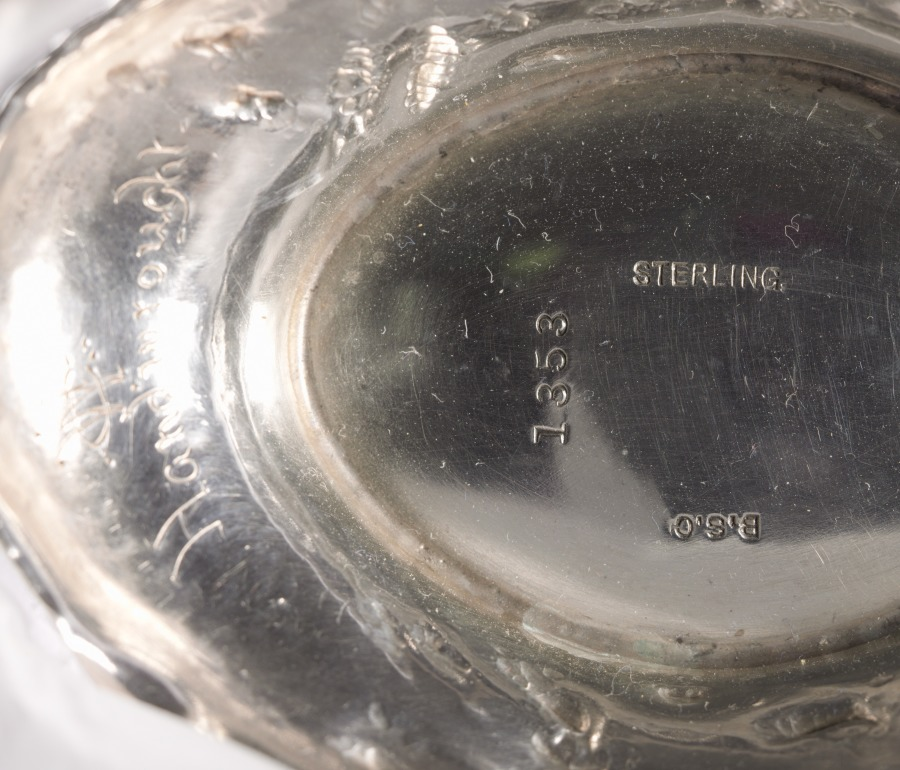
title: Sauce Boats and Trays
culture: America, Rhode Island, 19th century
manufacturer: Barbour Silver Company (American)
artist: attributed to William Christmas Codman (British, 1839–1921)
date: c. 1890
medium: silver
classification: Silver